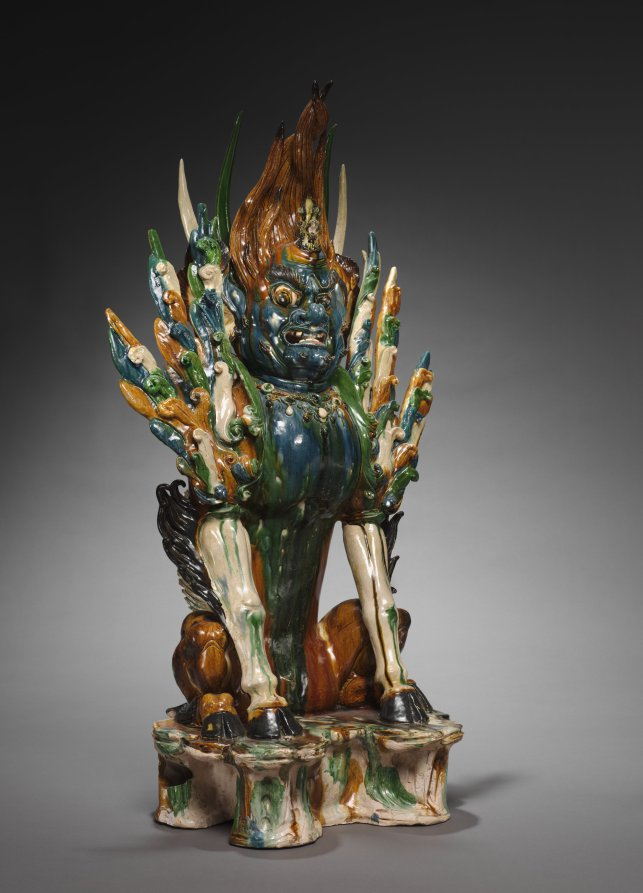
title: Tomb Guardian with Human Face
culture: China, probably Shaanxi province, Xi'an, Tang dynasty (618-907)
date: early 700s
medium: glazed earthenware, sancai (three-color) ware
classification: Ceramic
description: With their fierce expressions and exaggerated physical features, these two fantastic guardian creatures were intended to guard the entrance to a tomb, warding off evil as well as keeping the soul of the deceased from wandering. Known as "earth spirits" or qitou, this one sports a human face with huge protruding ears and a short horn surrounded by fiery, twisting hair; the other has an animal face and a pair of antlers growing above its eyebrows. Their many elongated spikes heighten the fearful intensity. Before tomb sculptures were placed in the tomb, they were carried through the streets in a funerary procession. Funerary gifts provided the deceased with means for the afterlife. They were also an expression of filial piety and demonstrated the wealth and power of the descendants.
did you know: Cobalt blue glaze used on the head and chest was imported from the Middle East.